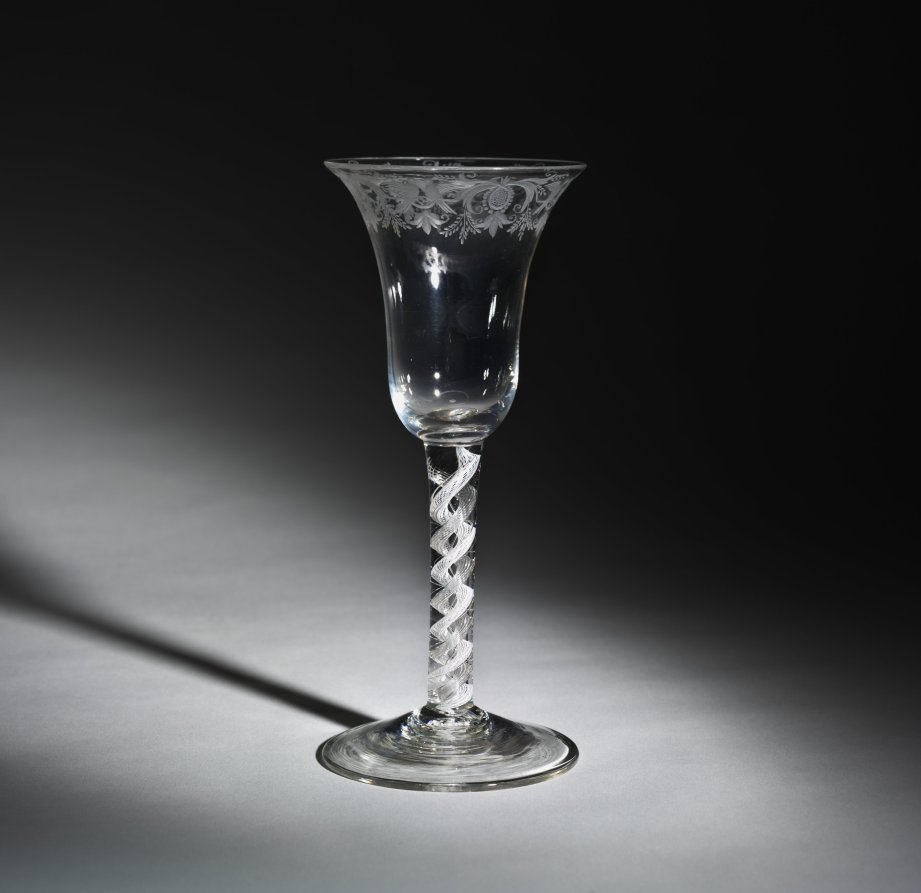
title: Goblet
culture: England, 18th century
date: c. 1725–1750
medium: glass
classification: Glass